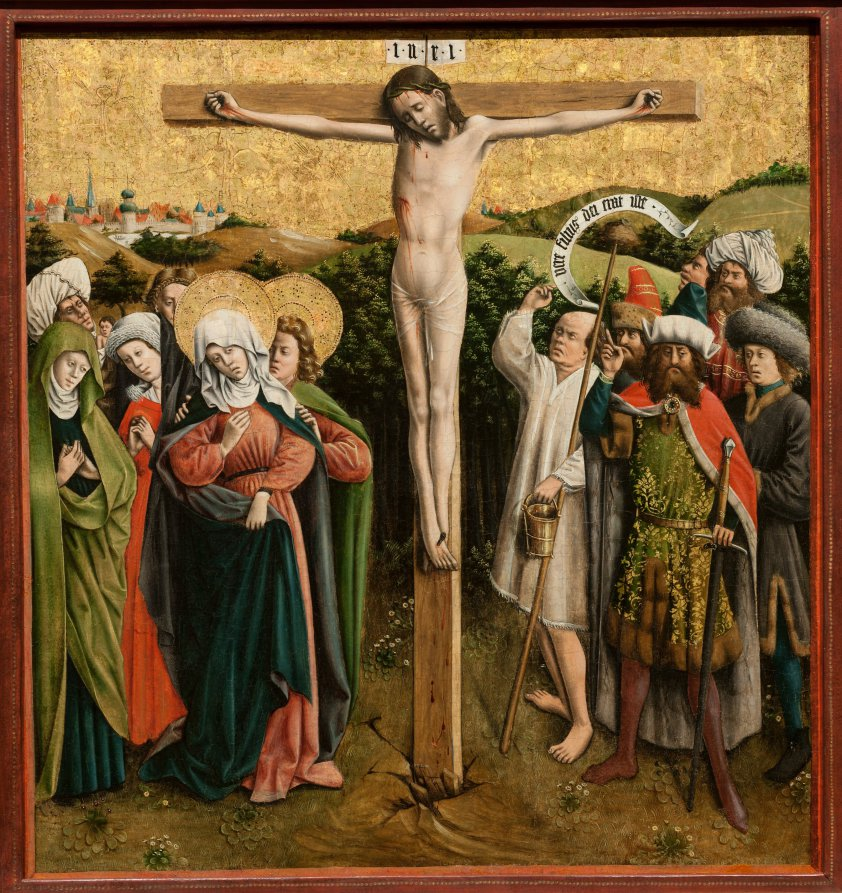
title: Altarpiece with The Passion of Christ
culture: Germany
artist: Master of the Schlägl Altarpiece (German)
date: c. 1440s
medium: oil and gold on wood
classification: Painting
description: The visual focus of this altarpiece is the suffering and death of Christ on the cross. So-called Passion cycles in art include the events leading up to and following the Crucifixion, not only as single subjects but as scenes meant to be read in sequence. Passion cycles were promoted by the two great teaching orders, the Franciscans and the Dominicans, for whom this subject represented the main religious drama of their churches, and also by the German mystics who advocated private contemplation on the humanity and suffering of Christ. The original context for this altarpiece remains unknown, but it was probably made for a religious institution in Westphalia in the Rhine Valley. During the 1870s it was given to the Abbey of Schlägl, near Linz in Upper Austria, from which both altarpiece and artist take their names. The altarpiece is not preserved today in its original format, and some of the individual scenes are missing. Scholars continue to debate the original number of scenes and their sequencing; nine of the original panels have survived.